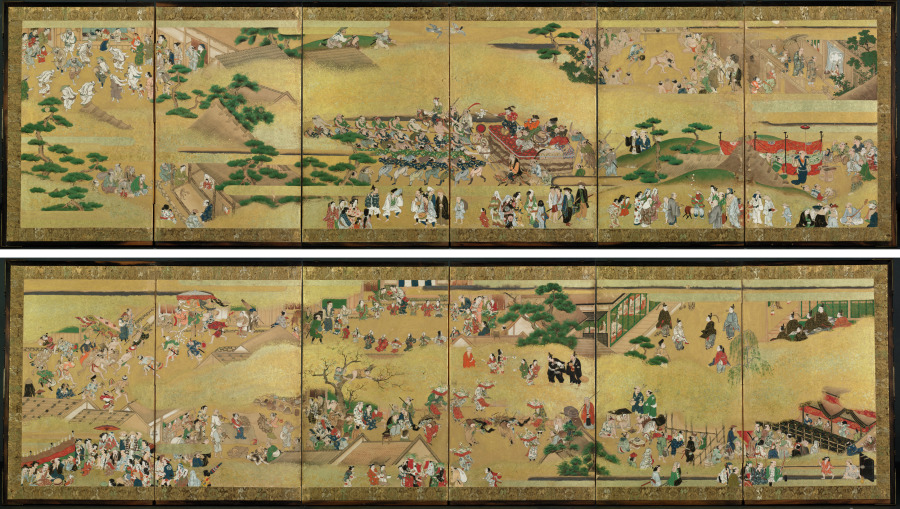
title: Festival Scenes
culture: Japan, Edo period (1615–1868)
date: 1615–99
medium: pair of six-panel folding screens; ink, color, gold, and gold leaf on paper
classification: Painting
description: Much smaller in size than standard Japanese folding screens, this lively pair depicts all manner of entertainments. Although at first they seem to show an ongoing festival, closer examination reveals that the screens comprise a series of isolated scenes from disparate occasions. In one screen, crowds gather around a bout of sumo wrestling as well as juggling and balancing acts. Elsewhere, teams of men pull a float bearing musicians costumed in foreign dress. There is also a dance circle with drums, a performing monkey, and a party of falconers. In the other screen, male courtiers observe a game of kickball played by noblemen, while their female counterparts watch from behind bamboo curtains. Others enjoy a theater performance. A children’s dance circle and a dance performance with ladies sporting elaborate headgear occupy the center of the screen. A group wielding huge parasols at the upper left of the screen reenacts episodes from legend, as still other performances, including dancing dogs, entertain the crowds below.